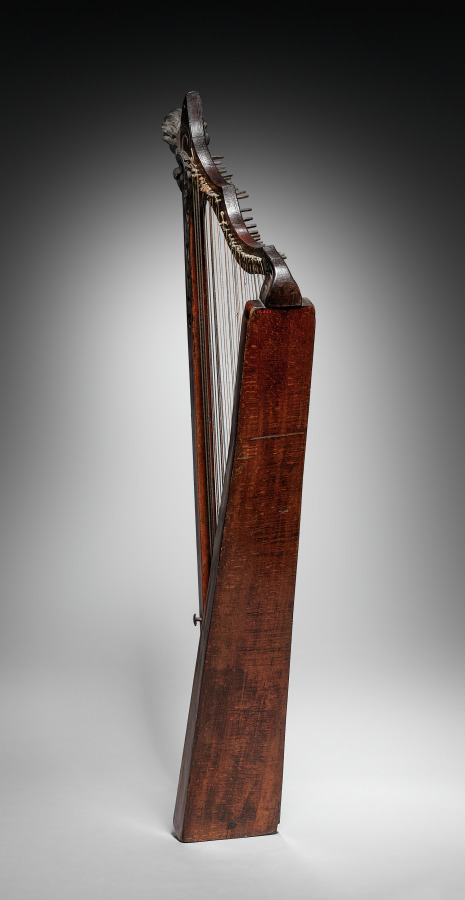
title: Harp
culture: France, 16th century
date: 1500s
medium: wood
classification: Musical Instrument